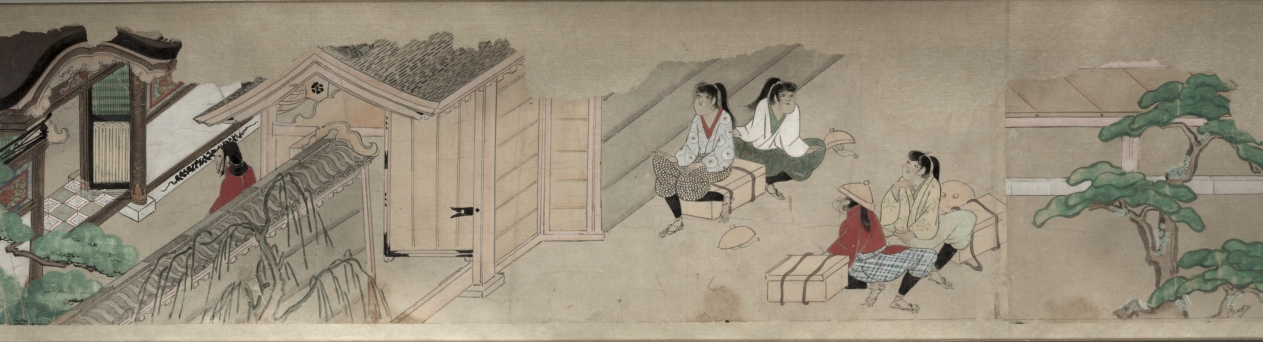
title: The Saltmaker's Story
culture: Japan, Edo period (1615–1868)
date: early 1600s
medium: One of a pair of handscrolls; ink, color, and gold on paper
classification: Painting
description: Once read and copied by girls at New Year’s celebrations and included in dowries, The Saltmaker’s Story is a rags-to-riches tale in which daughters are gifts from the gods. Despite his simple outlook, the main character progresses from humble roots as an associate at Kashima Shrine to the elite status of grandfather of the emperor through the intervention of the Kashima deity. The Saltmaker’s Story is traditionally presented in a set of three scrolls, but the text of this set has been removed by a previous owner, who remounted the illustrations as a pair. The paintings of this one take us from right to left through the second half of the tale.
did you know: This handscroll originally had texts before its paintings, but the texts were removed.